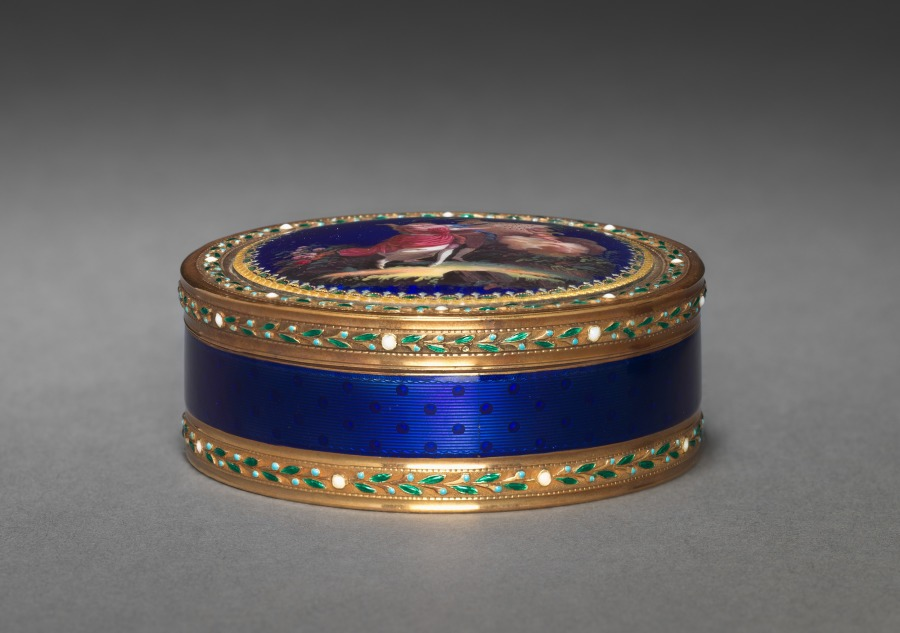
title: Box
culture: France, 18th century (style of Louis XVI)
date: 1700s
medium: gold and enamel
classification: Enamel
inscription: cupids holding book inscribed: Serment d'amour t-outs la vie.